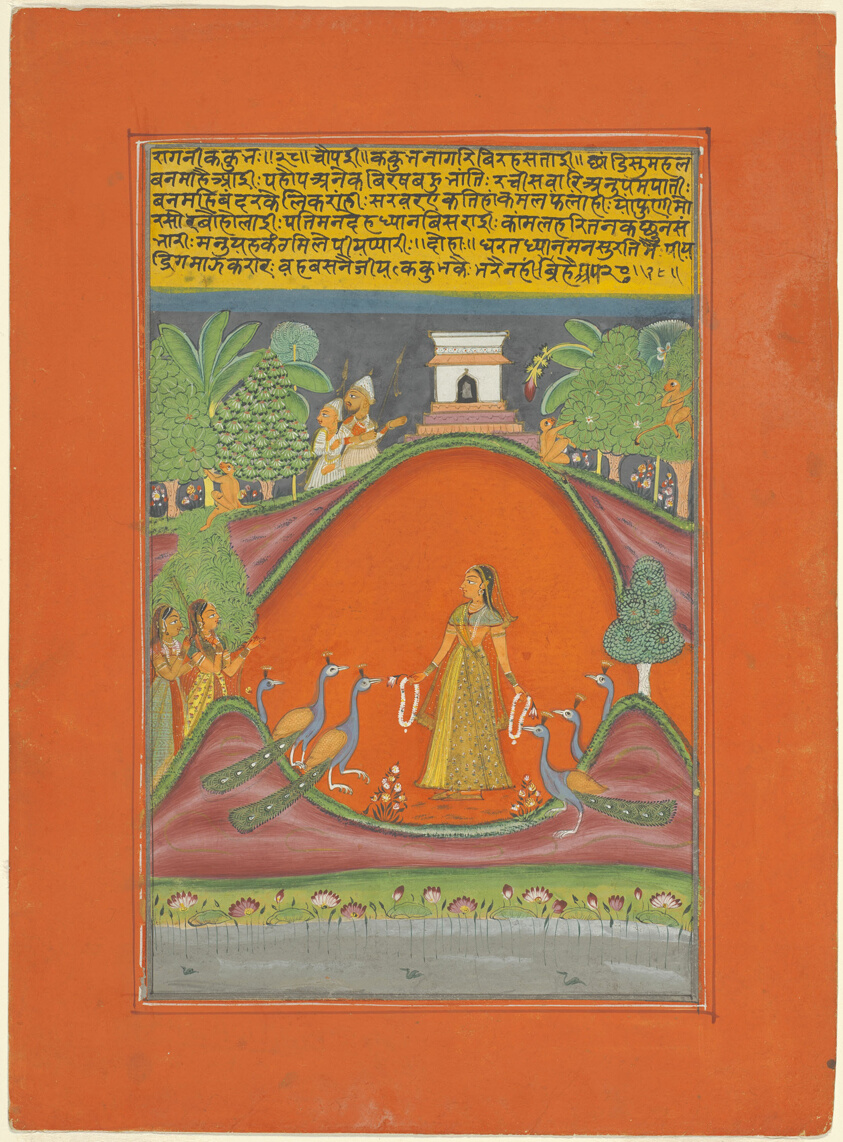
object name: Painting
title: Ragini Kakubha, Page from a Jaipur Ragamala Set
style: South Asian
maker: India; Rajasthan, Jaipur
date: c. 1750-1770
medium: Opaque watercolor and gold on paper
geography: Rajasthan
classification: watercolor; painting; asian art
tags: music, musicians